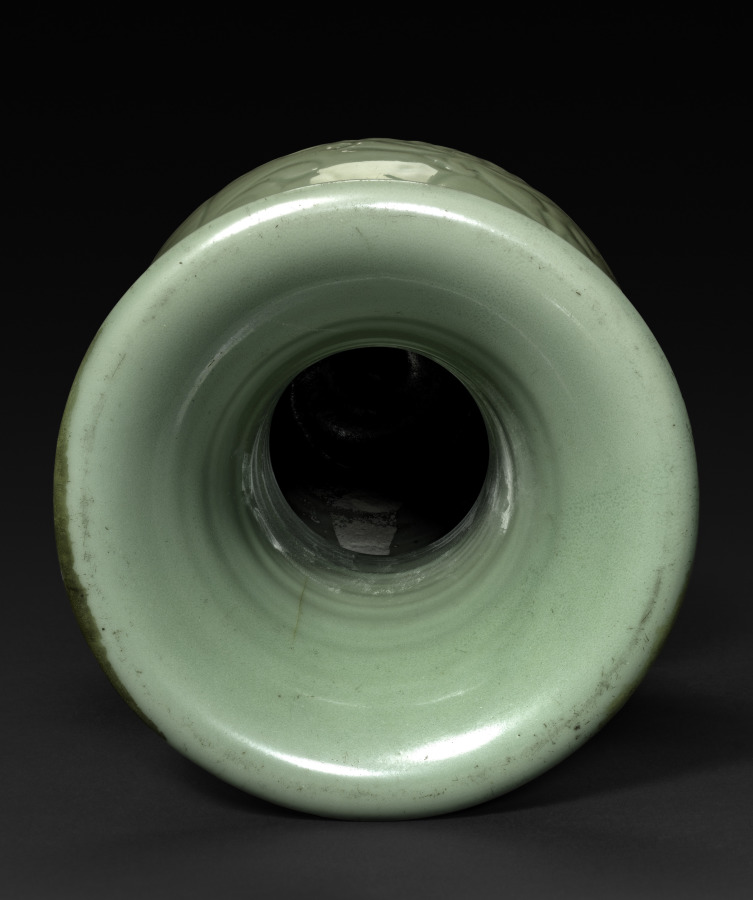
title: Vase: Celadon Ware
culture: China, Ming dynasty (1368–1644)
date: 1368–1644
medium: stoneware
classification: Ceramic